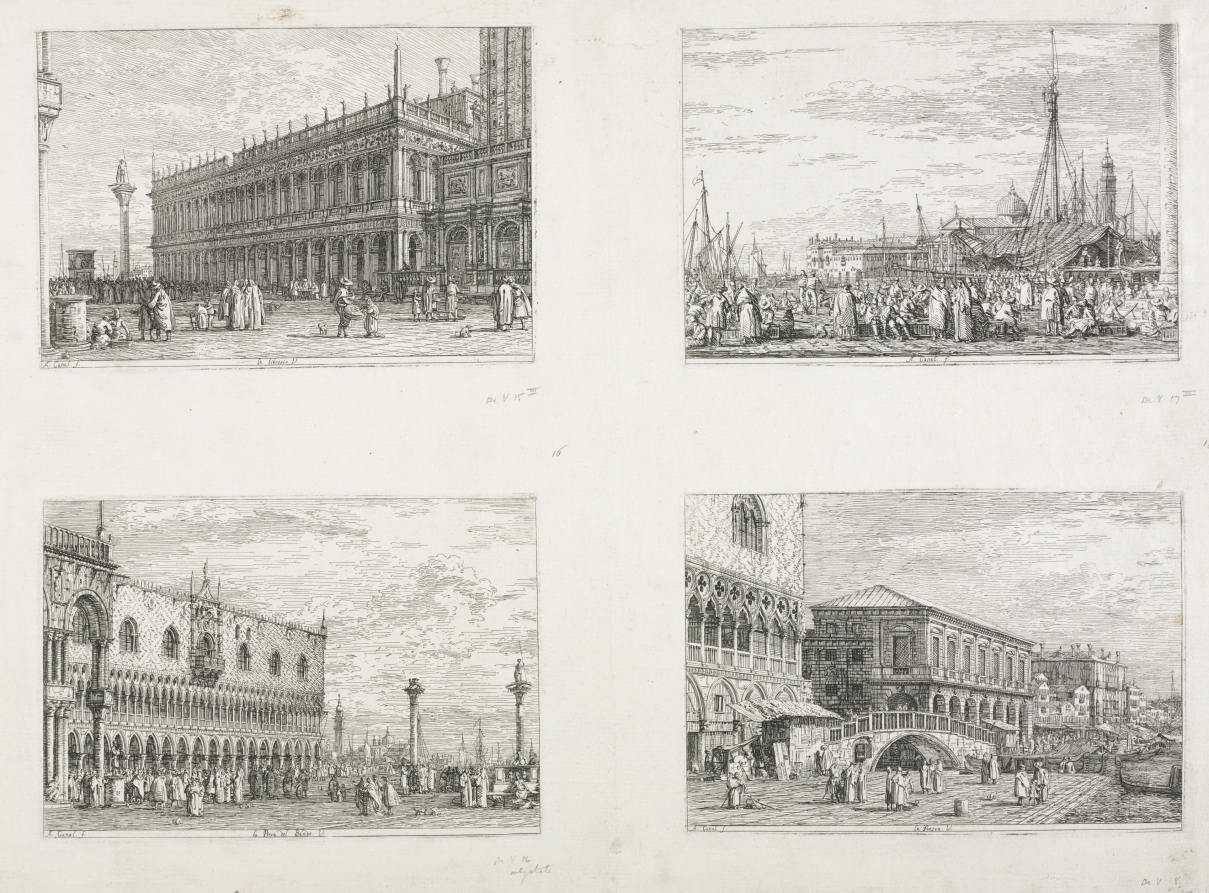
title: Views: The Market on the Molo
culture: Italy, Venice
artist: Antonio Canaletto (Italian, 1697–1768)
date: 1735–1746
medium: etching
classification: Print